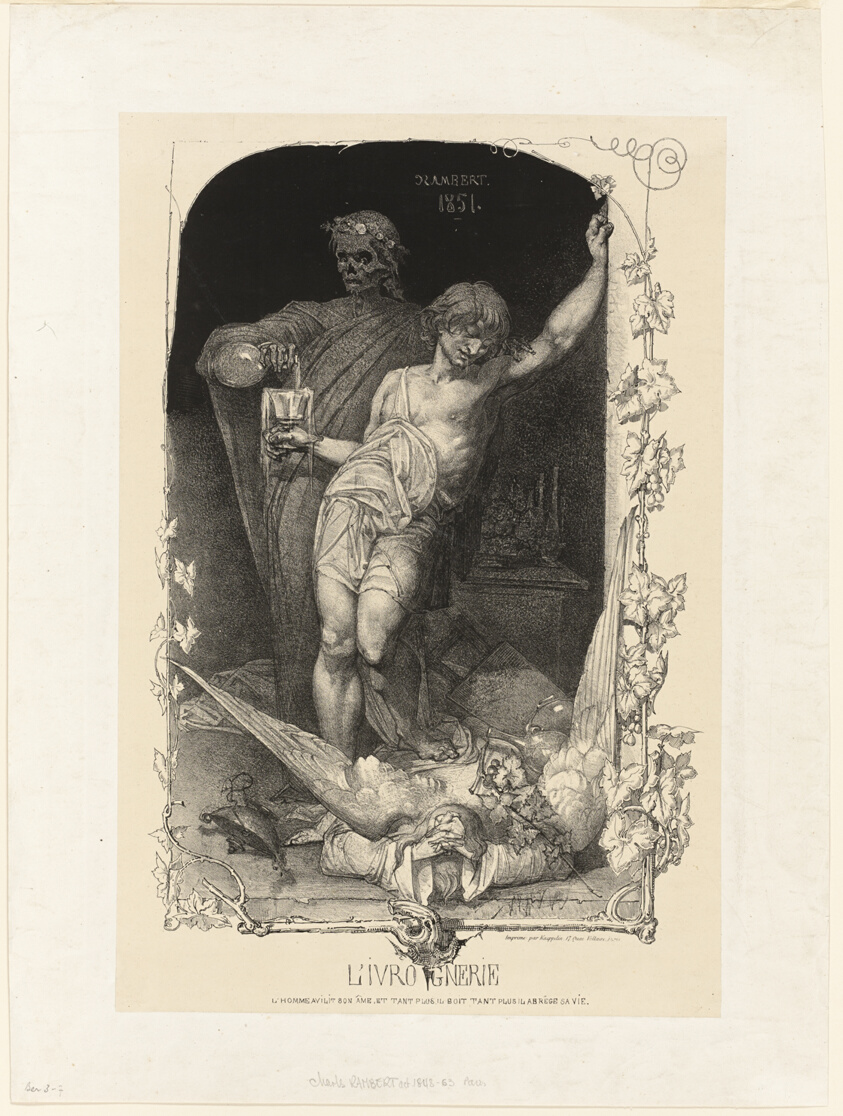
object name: Print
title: Drunkenness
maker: Charles Rambert (French, c. 1836-1867, died before 1899); printed by Kaeppelin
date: 1851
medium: Lithograph, possibly from a zinc plate, or zincograph, in black crayon, pen and ink, scraping and tusche on cream wove paper, laid down on ivory wove paper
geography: France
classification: lithograph; print; prints and drawing